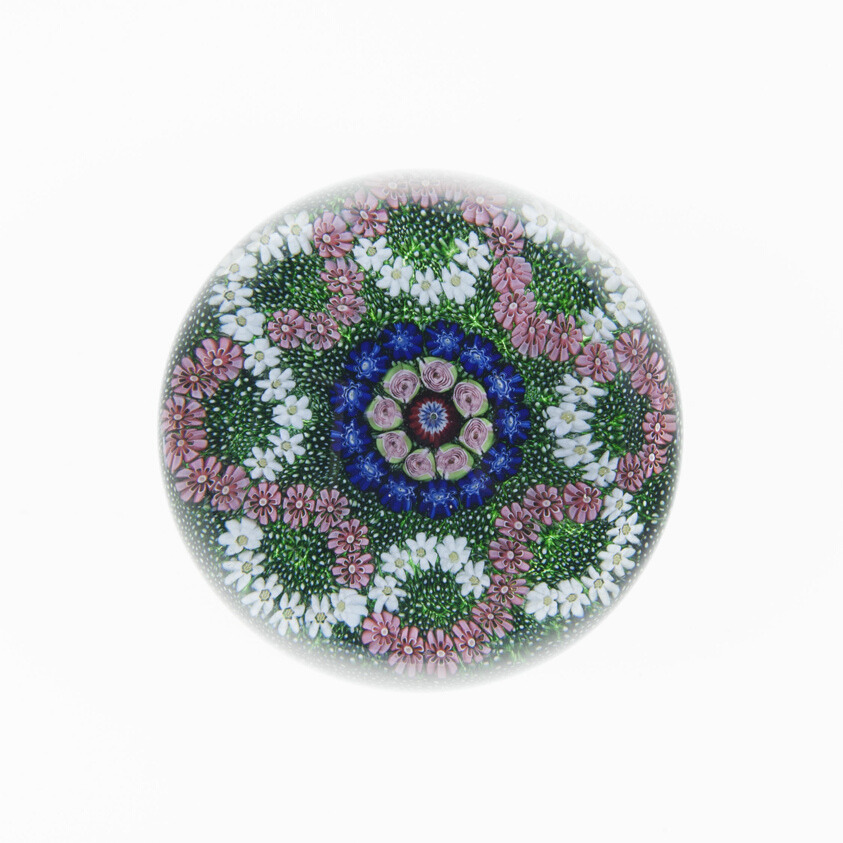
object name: Glass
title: Paperweight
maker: Clichy Glassworks (Cristalleries de Clichy); Clichy, France, 1837-1885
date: c. 1845/60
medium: Glass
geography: France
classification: paperweight; glass